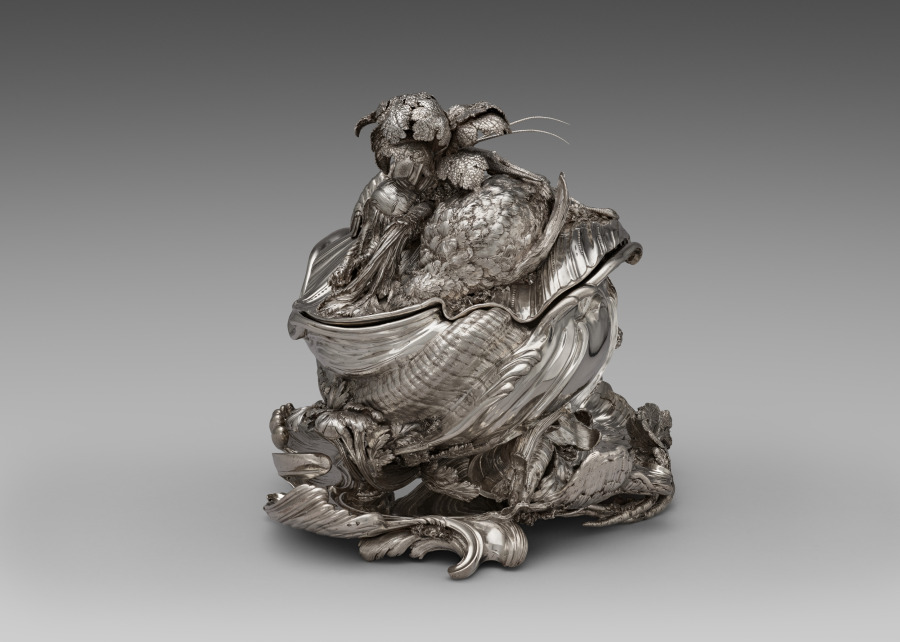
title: Covered Tureen on Stand (Pot-à-oille)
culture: France, Paris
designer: Juste-Aurèle Meissonnier (French, 1695–1750)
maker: Pierre-François Bonnestrenne (French)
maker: Henry Adnet (French, 1745)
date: 1735–38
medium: silver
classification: Silver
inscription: [Maker’s mark of Pierre−François Bonnestrenne, beneath platter; inside tureen (two marks)]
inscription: [Warden's mark for Paris, 1734−1735, beneath platter; inside tureen; inside cover]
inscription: [Charge mark of Hubert Louvet, Paris, 1732-1738, on platter border; beneath platter; beneath tureen; inside cover; inside tureen (two marks)]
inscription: [Discharge mark of Louis Robin mostly used for stamping small work, Paris 1738−1744, on platter border; beneath tureen]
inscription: [Warden's mark for Paris, 1736−1737, on platter border]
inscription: [Possibly British import mark, London, 1925, on platter border]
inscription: [Possibly mark of the British firm Charles & Richard Comyns, on platter border]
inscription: [Discharge of Louis Robin mostly used for stamping gold and silver between 1738 and 1744, beneath tureen; outside cover]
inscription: [Maker’s mark of Henry-Guillaume Adnet, inside cover]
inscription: [Two small undefined marks, inside cover]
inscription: [Under the surface of the platter the engraved signature]: “FAIT-PAR-I-A-MEISSONIER-ARCHITECTTE”; [and the weight] “673=5"; “No. [v] I 50 £ b76Sol”; [and the numbers] “A nº 1”; “A nº2”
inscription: [On tureen lip]: "MEISSONIER"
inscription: [On tureen lip]: “A nº 3”; “A nº2” [in order to place the tureen correctly on the stand]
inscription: [Numbers engraved on the stand, the tureen, and the cover to show how the piece should be assembled]: “A nº 1” [on the base of the tureen; beneath the cover; on the platter], “A nº 2” [on the platter], “A nº 3” [on the exterior rim of the tureen], “A nº4”; “A nº 5” [outside the cover], “A nº 7” [on the border of the platter]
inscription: [Two warden's marks for Paris, 1735-1736, beneath tureen]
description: This tureen exemplifies the French Rococo style, an artistic movement celebrating naturalistic forms that developed in Paris during the early 1700s. In contrast to classical, controlled symmetry, Rococo forms morph, twist, and spill into the space around them. Meissonnier embellished this tureen in a picturesque arrangement of vegetables and creatures, transforming a utilitarian object into a decadent display of wealth and abundance. This masterpiece comes from a set of two tureens commissioned by the English Duke of Kingston during an extended stay in Paris in the 1730s.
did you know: The langoustine, pigeon, and vegetables were cast using real examples giving the silver copies lifelike detail and appearance.